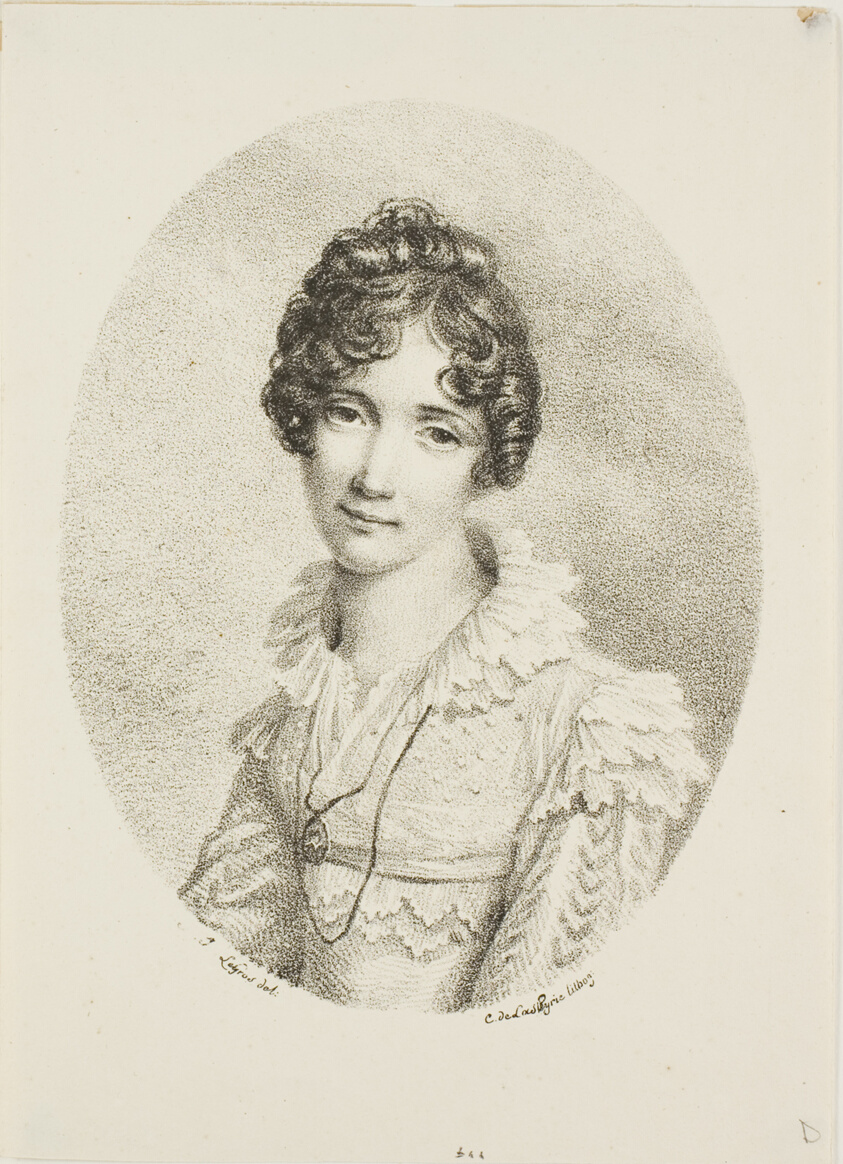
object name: Print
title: Portrait of a Young Woman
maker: Sauveur J. Legros (French, 1754-1834); printed by Comte de Charles Philibert Lasteyrie du Saillant (French, 1759-1849)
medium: Lithograph in black on ivory wove paper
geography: France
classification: lithograph; print; prints and drawing